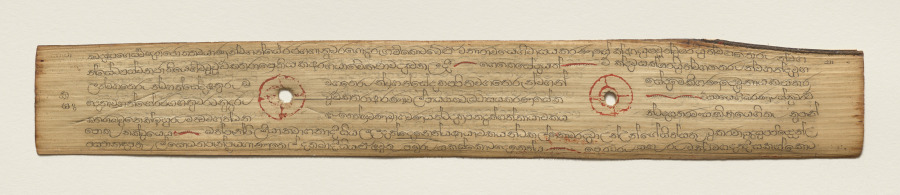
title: Leaf from a Buddhist Manuscript (recto)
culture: Sri Lanka, Singhalese, Late 17th century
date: c. 1700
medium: fiber paper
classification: Manuscript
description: Palm leaf material is still used for manuscripts in Sri Lanka. The palm leaves are prepared first by boiling them, drying them in the sun, and then rubbing them with oils. Scribes then use a metal stylus to incise the text. Then charcoal powder is wiped across the pages, filling in only the inscribed lines.